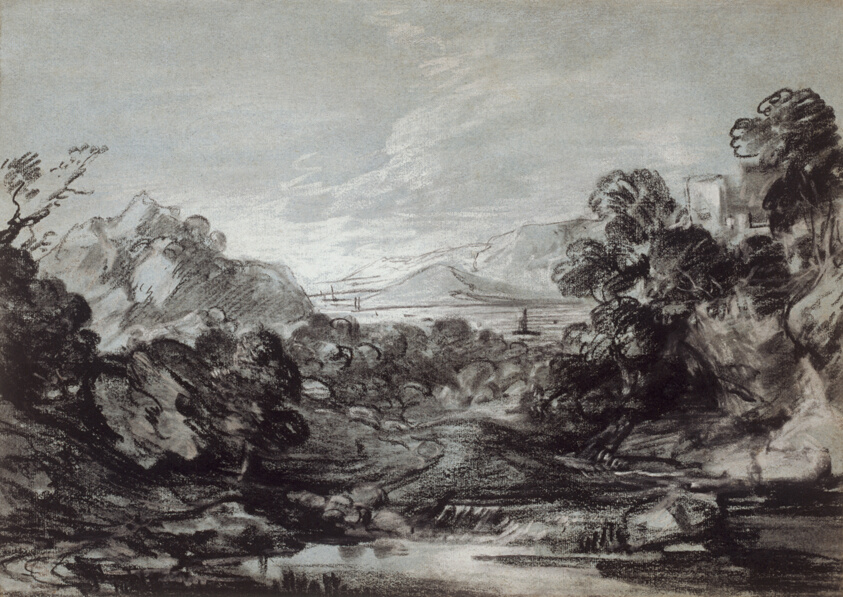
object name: Drawing and Watercolor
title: Coastal View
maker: Thomas Gainsborough (English, 1727-1788)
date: 1786/88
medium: Black chalk, heightened with white chalk, on blue laid paper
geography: England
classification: chalk; drawings (visual works); prints and drawing